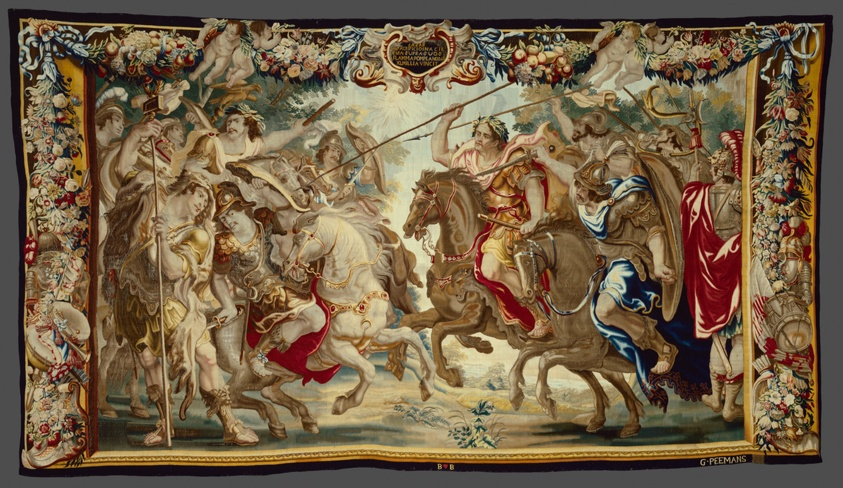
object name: Textile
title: Caesar Defeats the Troops of Pompey from The Story Caesar and Cleopatra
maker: After a design by Justus van Egmont (1601–1674); Woven at the workshop of Gerard Peemans (1637/39–1725); Flanders, Brussels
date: c. 1680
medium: Wool and silk, slit and double interlocking tapestry weave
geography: Flanders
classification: weaving - tapestry; textile